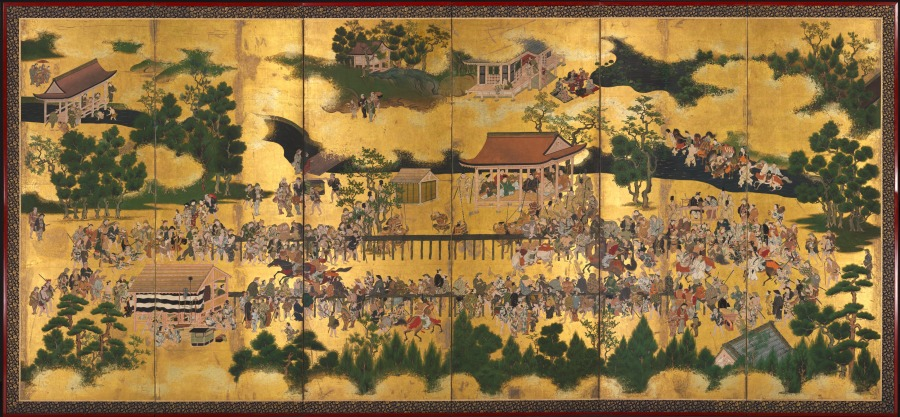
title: Horse Race at the Kamo Shrine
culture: Japan, Edo period (1615–1868)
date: early to mid-1600s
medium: Pair of six-panel folding screens; ink and color on gilded paper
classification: Painting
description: Here nearly 600 figures, engaged in a bewildering array of activities, have gathered at the Kamo Shrine in Kyoto for the horse race held annually on May 5 since at least the 800s. The entire populace seems to have turned out, apparent in the diversions and revelries spread out across these resplendent byøbu. The race begins on the right screen and continues far into the left along the lower half of the composition. Here the painter's genius for depicting engaging crowd scenes, a characteristic of Heian pictorial compositions, emerges in full force. The range of textile patterns alone is astonishing. The upper regions of the composition feature the shrine, its setting in northern Kyoto west of Lake Takaragaike, its architecture, and the visitors whose intentions range from casually mundane to spiritual. These paintings were originally part of a much larger pictorial narrative of linked murals in fusuma-e format. Four segments are known today from what must have been an extraordinary room of contiguous surfaces, executed by studio-trained but anonymous masters of yamato-e genre painting in Kyoto. The scale of the paintings and the quality of the materials indicate that they were commissioned by a sophisticated, wealthy patron.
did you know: The winner is decided by the distance between horses, not by which horse finished first.